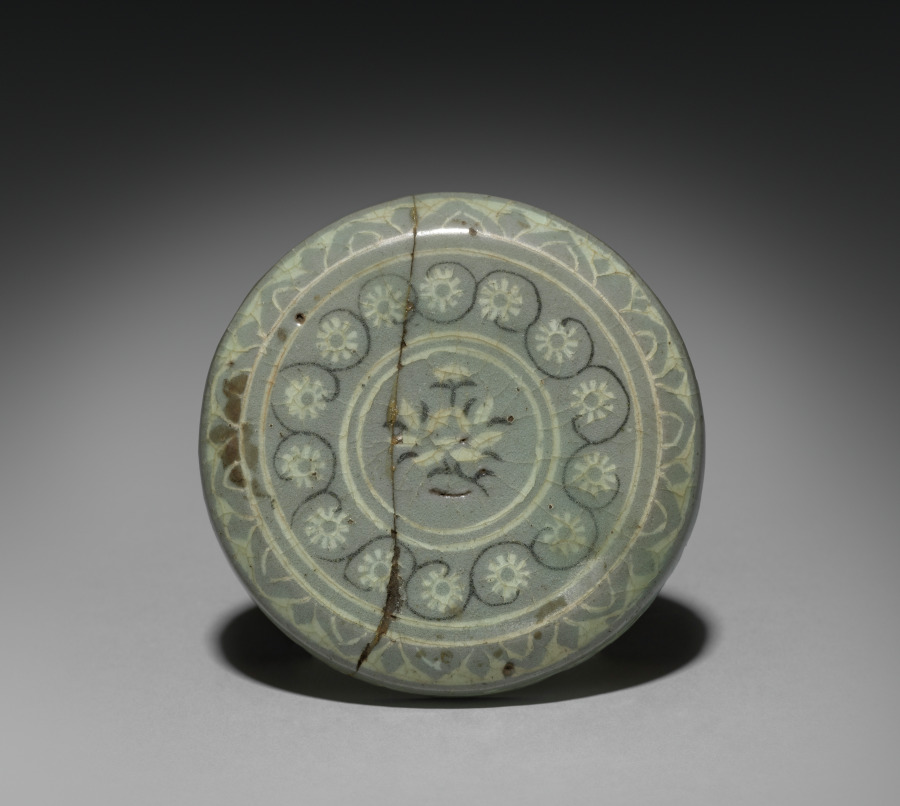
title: Cover with Chrysanthemum and Scroll Design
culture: Korea, Goryeo dynasty (918–1392)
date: 918–1392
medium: inlaid celadon ware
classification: Ceramic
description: Celadons, spoons, seals, and bronze mirrors were the most common burial objects in tombs during the Goryeo period (918–1392). Once used to contain colored powder, rouge, and eyebrow gel for makeup, this small container was one of the standard goods that furnished elites' tombs. Both women and men used the grain powder of rice or millet for whitening their skin, safflower extract for rouge, and plant ash or soot for eyebrow gel. Yet, natural-looking makeup seems to have been the most favorable one in Korea according to the travelogue by Xu Jing (1091–1153), the Chinese diplomat who visited Korea in 1123.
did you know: This ceramic container was used to store either incense or cosmetics.